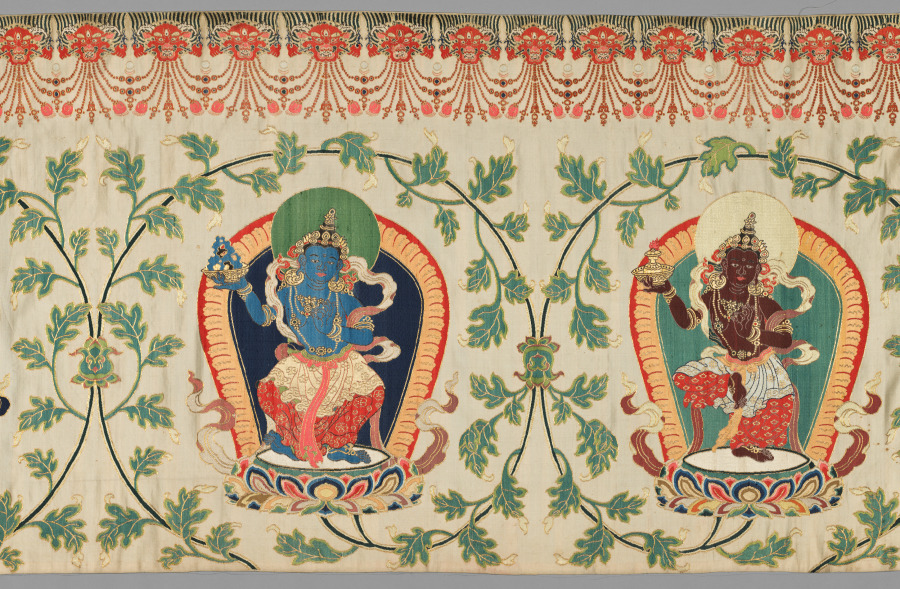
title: Brocaded Strip, known as "Imperial Tribute Brocade"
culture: China, Qing dynasty (1644-1911)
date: c. 1770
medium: brocaded satin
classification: Textile